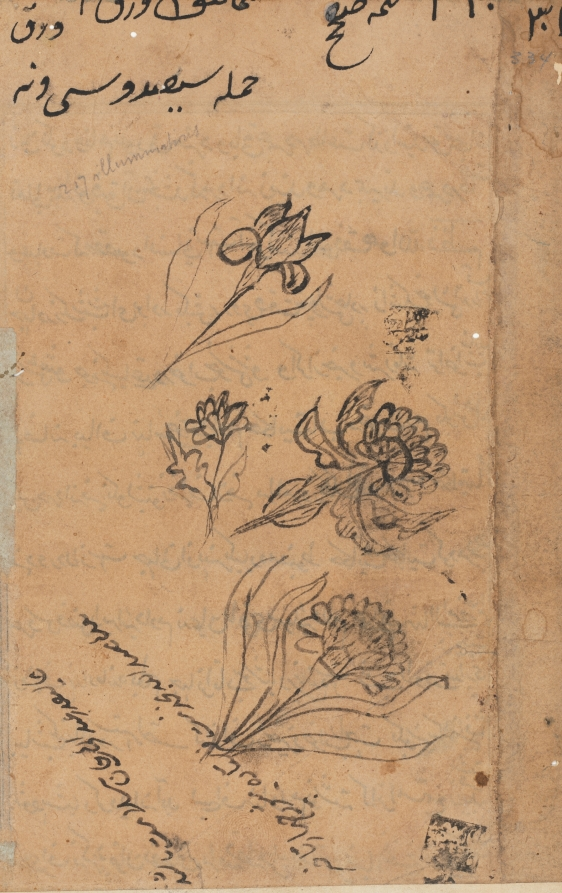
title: Page from Tales of a Parrot (Tuti-nama): text page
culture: Mughal India, court of Akbar (reigned 1556–1605)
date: c. 1560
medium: gum tempera, ink, and gold on paper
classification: Painting